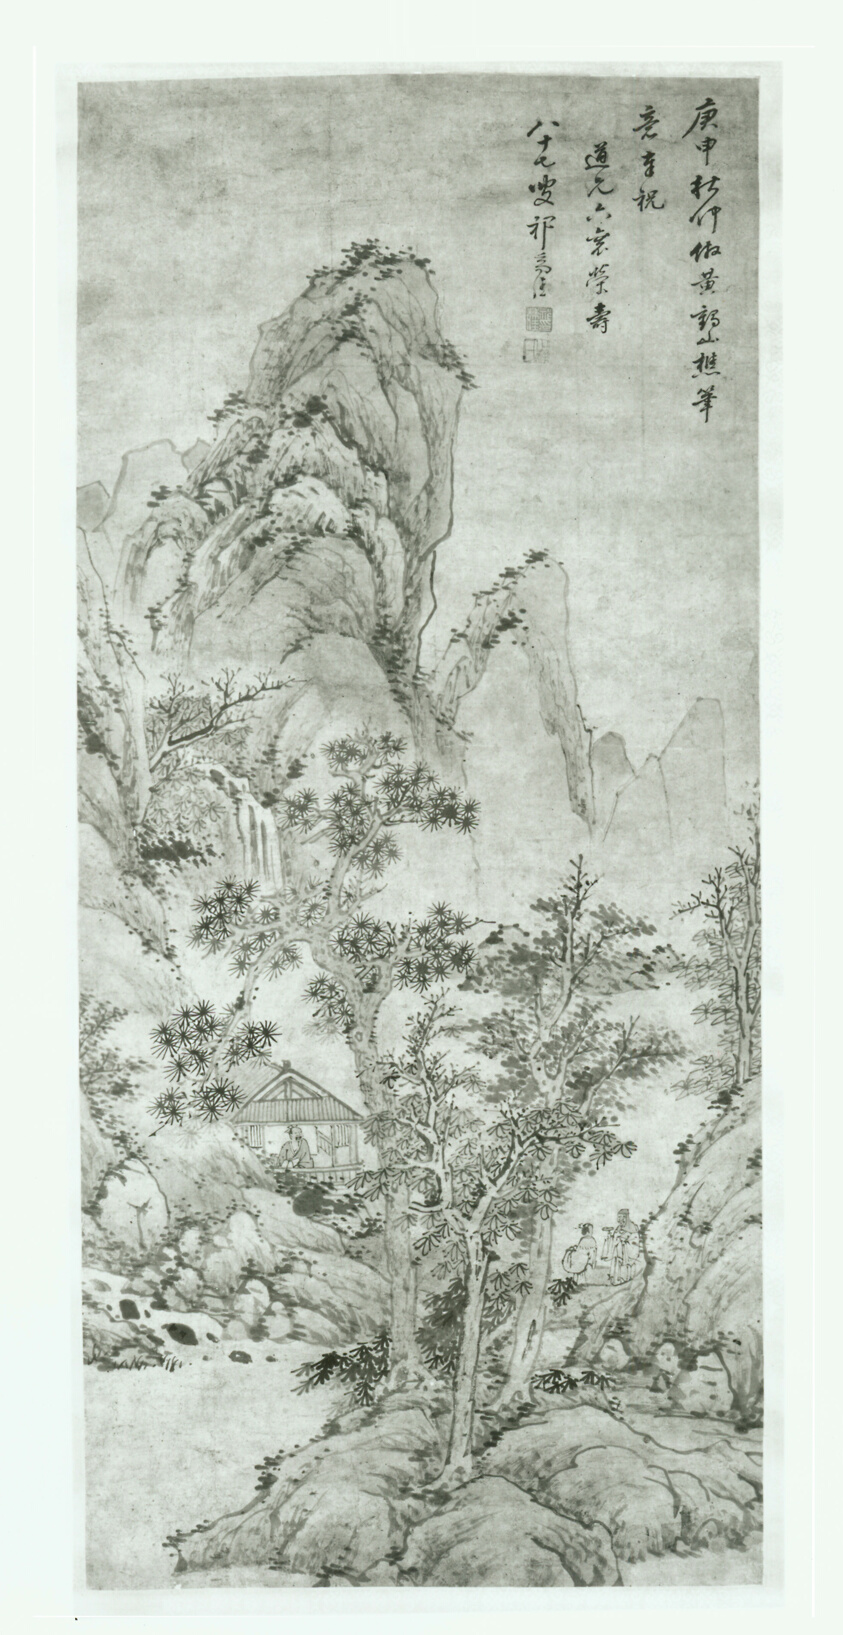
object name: Painting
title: Landscape after Wang Meng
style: Chinese (culture or style)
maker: Qi Zhijia (Chinese, 1594 - after 1682)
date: Qing dynasty (1644–1911), 1680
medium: Hanging scroll; ink and light color on paper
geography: China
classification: hanging scroll; painting; asian art